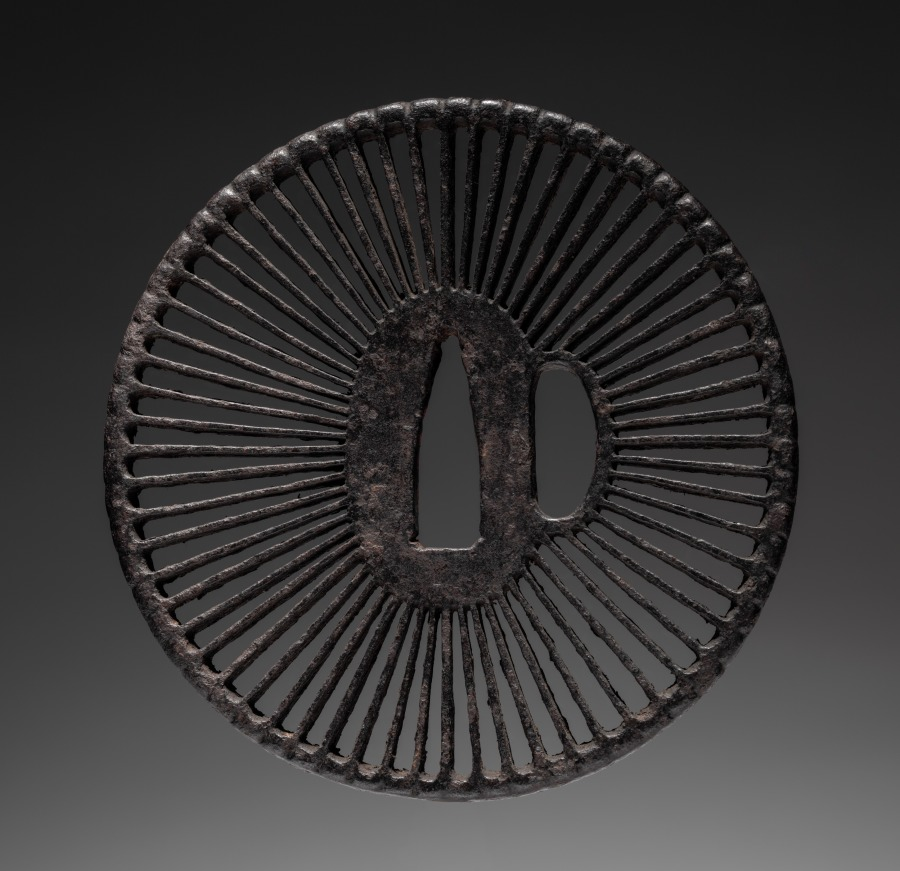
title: Sword Guard (Tsuba)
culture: Japan, possibly Edo period (1615-1868)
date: c. 1615–1868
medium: iron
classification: Arms and Armor